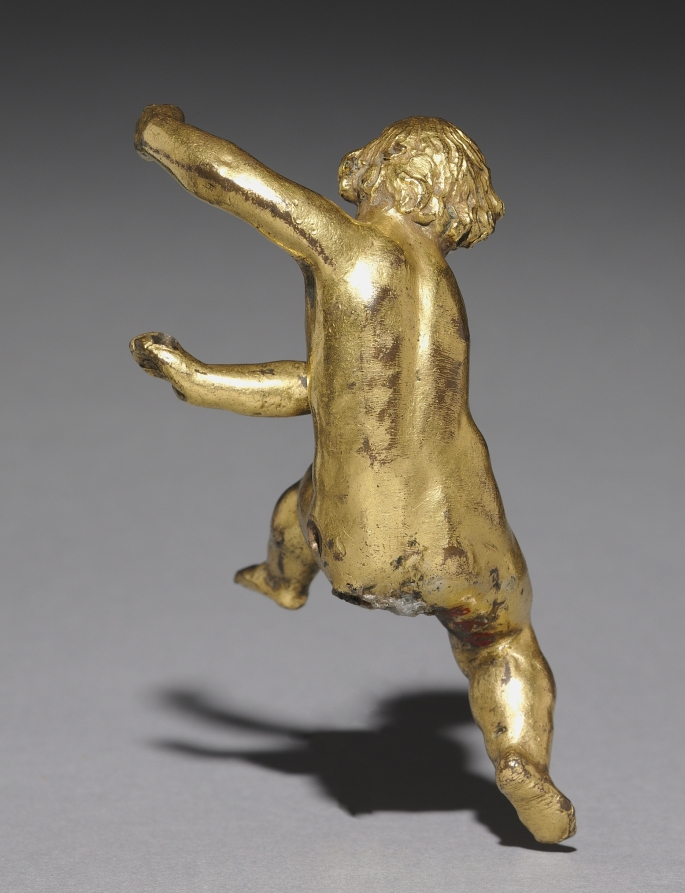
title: Putto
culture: Italy, Rome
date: late 1500s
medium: gilt bronze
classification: Sculpture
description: These gilt bronze putti, or figures of plump male children in the nude, are near mirror images of one another. Both are seated, with their arms flung to the side. Minimal detailing exists in the hands and feet, with the fingers and toes signified only by simple line indentations. The function and original placement of the putti is uncertain, but their posture and the placement of their hands suggest that originally they may have been placed in a larger statue group, perhaps holding either side of a banner, or even a piece of furniture. A will drawn up by Guglielmo della Porta in 1558 mentions the existence of bronze Passion scenes and crucifixes, suggesting that the artist may have created other small bronze groups as well. John Pope-Hennessey attributed these works to della Porta based on their similarity to the figures of Apollo and Artemis in Latona and her Children (Victoria and Albert Museum, London) and the monumental putti in his Tomb of Cardinal Paolo Cesi in Santa Maria Maggiore in Rome, although more recent research points away from della Porta as the maker. Ana Dieglio 2009